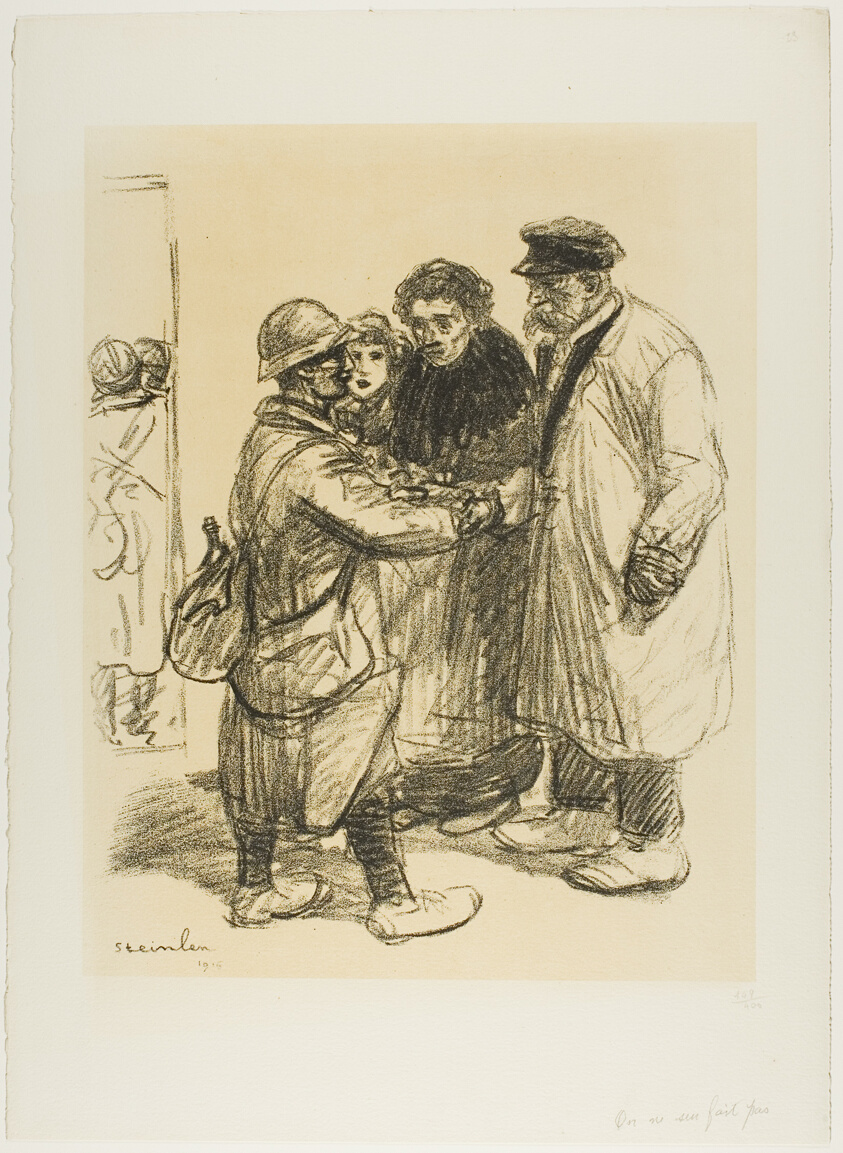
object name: Print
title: One Doesn't Get Used to It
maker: Théophile-Alexandre Steinlen; French, born Switzerland, 1859-1923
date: 1915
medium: Lithograph in black over fawn tint on thick off-white wove paper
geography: France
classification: lithograph; print; prints and drawing